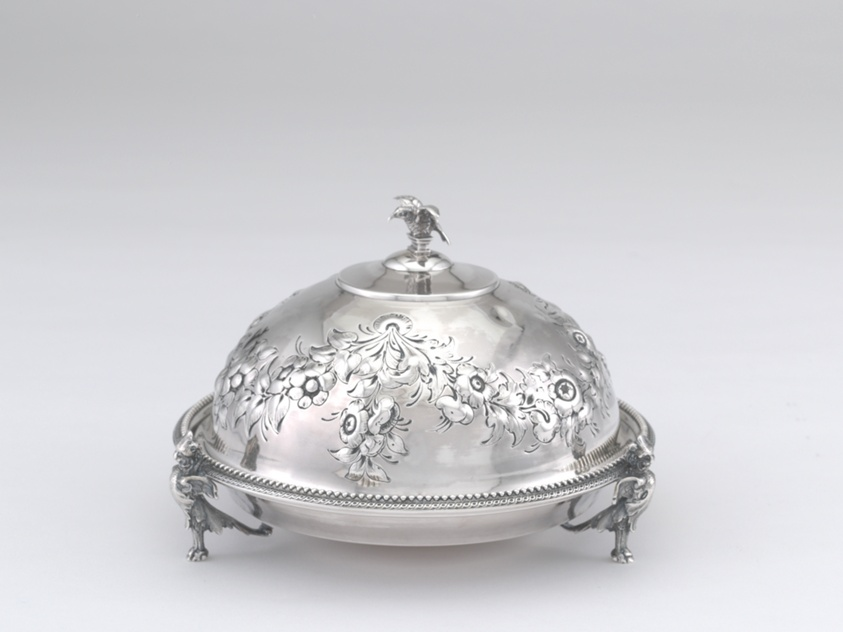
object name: Metalwork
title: Butter Dish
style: 19th century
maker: Gorham Manufacturing Company (American, founded 1831); Providence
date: 1853–65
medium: Silver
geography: Providence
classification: vessel for serving food; dish (vessel); silver; american decorative arts; american arts; decorative arts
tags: butter dish, birds, flowers, eagles, dining, eating